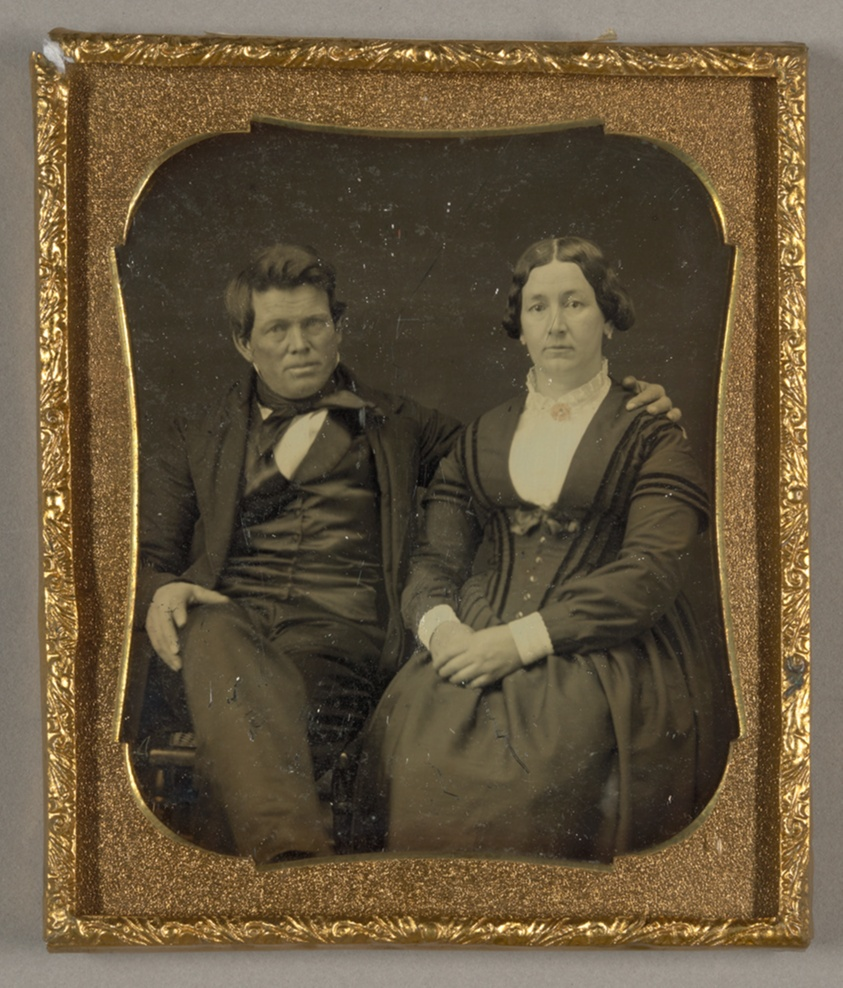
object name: Photograph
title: Untitled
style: 19th century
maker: Artist unknown; 19th century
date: 1839/60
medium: Daguerreotype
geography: Unknown Place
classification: daguerreotype; photographic process; photography; photograph